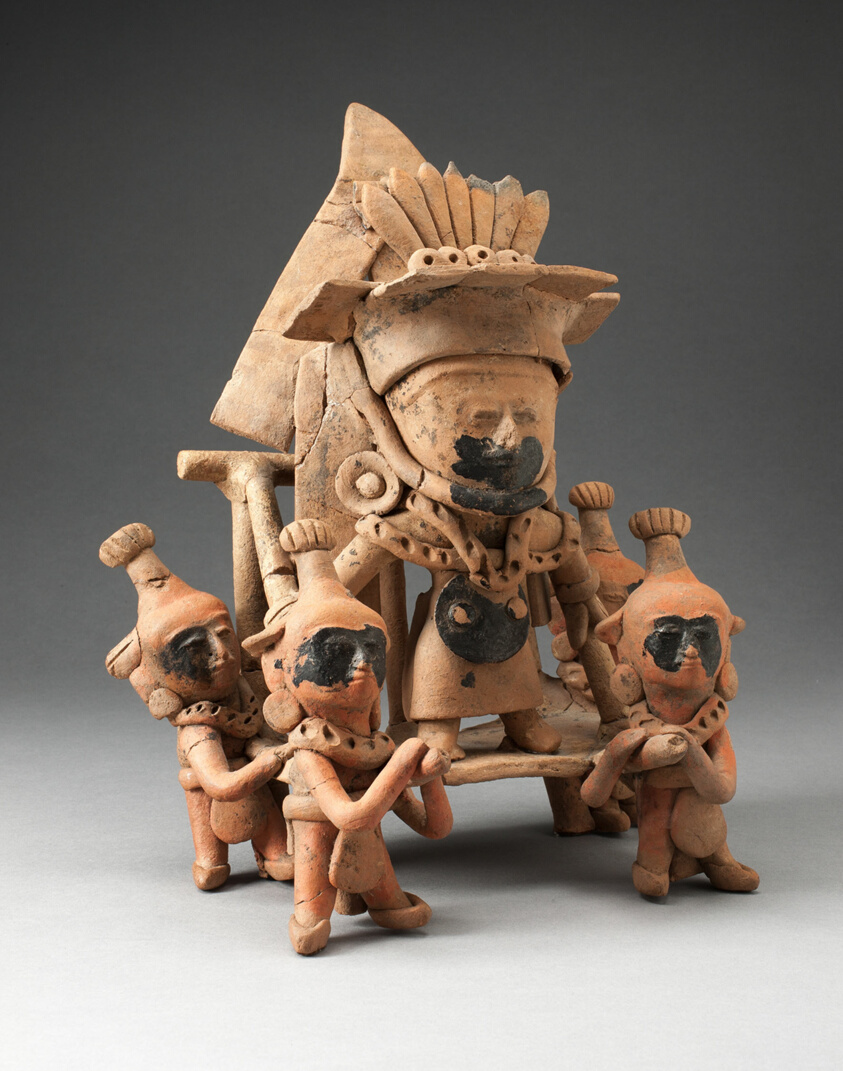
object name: Sculpture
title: Figure Carried in a Litter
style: classic veracruz, Arts of the Americas, veracruz, mesoamerican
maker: Late Classic Veracruz; El Faisan, Veracruz, Mexico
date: 600–950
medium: Ceramic and pigment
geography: Veracruz state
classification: sculpture; earthenware; art of the americas; ceramics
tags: ceremony, rulership, people